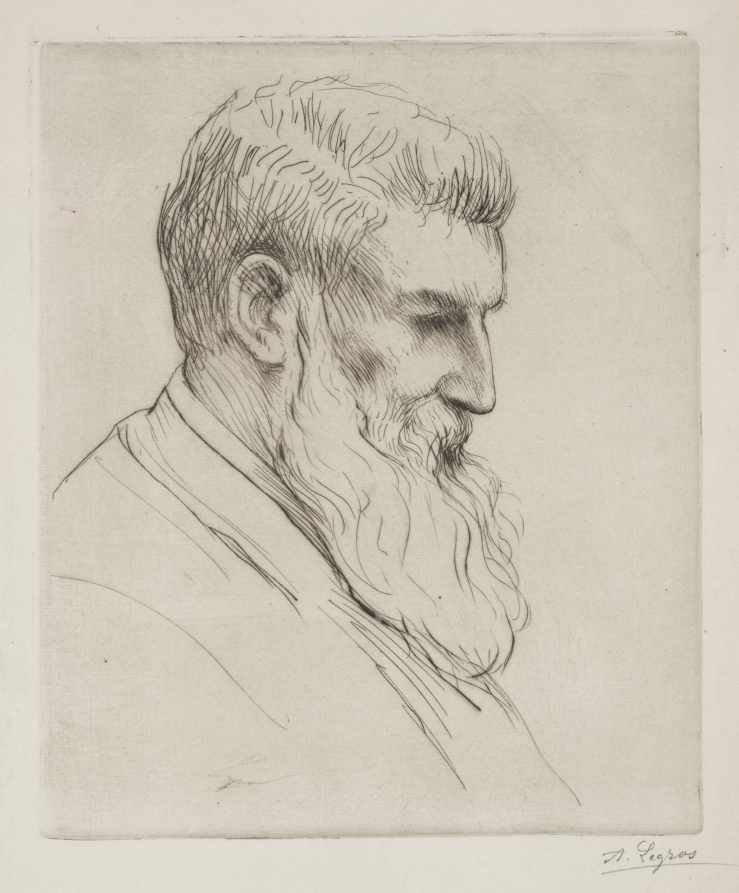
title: Portrait of Craibe Angus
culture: France, 19th century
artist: Alphonse Legros (French, 1837–1911)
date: c. 1857–1911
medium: drypoint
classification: Print